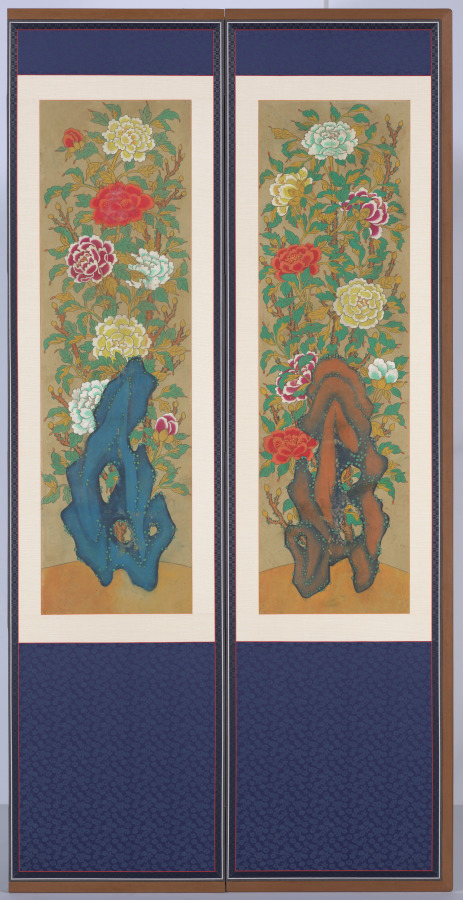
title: Peonies and Rocks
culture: Korea, Joseon dynasty (1392−1910) or Japanese colonial period (1910−1945)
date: early 1900s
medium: Six-panel folding screen; ink and color on silk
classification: Painting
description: By the late nineteenth century, peony paintings with bold designs and striking graphic stylization were increasingly produced and consumed by middle-class members because of its symbolic meaning: prosperity and wealth.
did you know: In East Asian art, peonies traditionally symbolize prosperity and wealth.